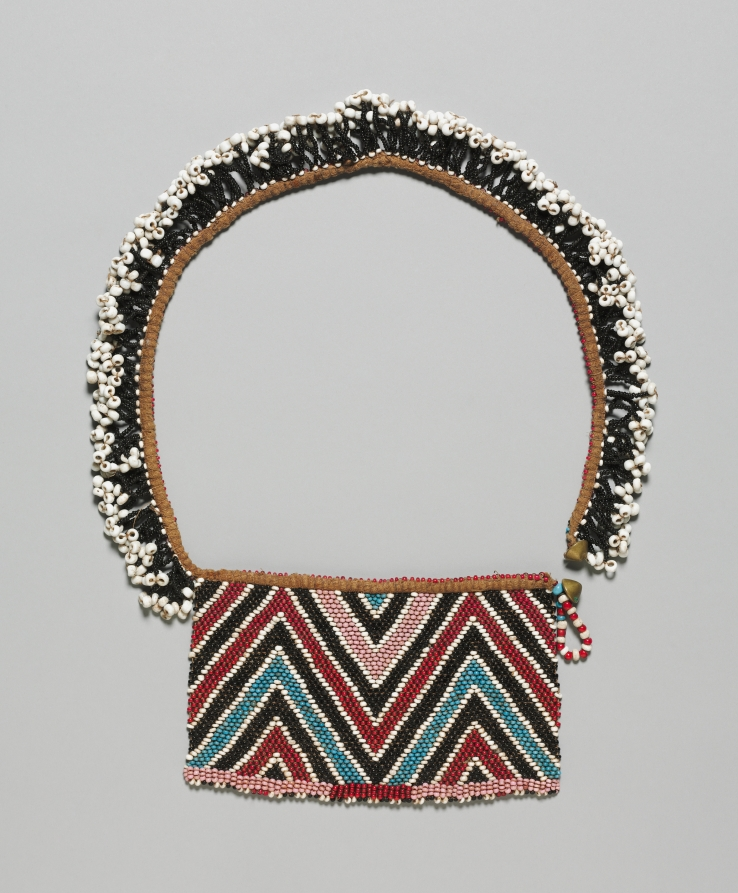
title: Neckpiece with panel (umphapheni)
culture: Africa, Southern African, South Africa, Southeast Cape Region, Northern Nguni (Zulu)-style maker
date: 1800s–1900s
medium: Glass beads, plant fiber, copper alloy, and iron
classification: Jewelry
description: Consisting of a tasseled length attached to a rectangular panel joined by metal buttons, this neckpiece (umphapheni) was likely worn along with waistbands and headpieces with the same color scheme and patterns. Joined together using stitches and zig-zag patterns popular around the turn of the 20th century, glass beadwork was heavy to wear. The fringe—typical of Zulu-style Northern Nguni beadwork—added additional weight. The imported glass beads testify to centuries of trade connections between southern Africa and Europe, while the brass buttons—probably drawn from a British soldier’s uniform—allude to the Anglo-Zulu conflicts of the 1800s.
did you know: The seed beads that make up this neckpiece were imported to southern Africa by European traders who tailored their wares to local tastes and color preferences; beads came first from Venice and Murano, and later from Bohemia in the twentieth century.